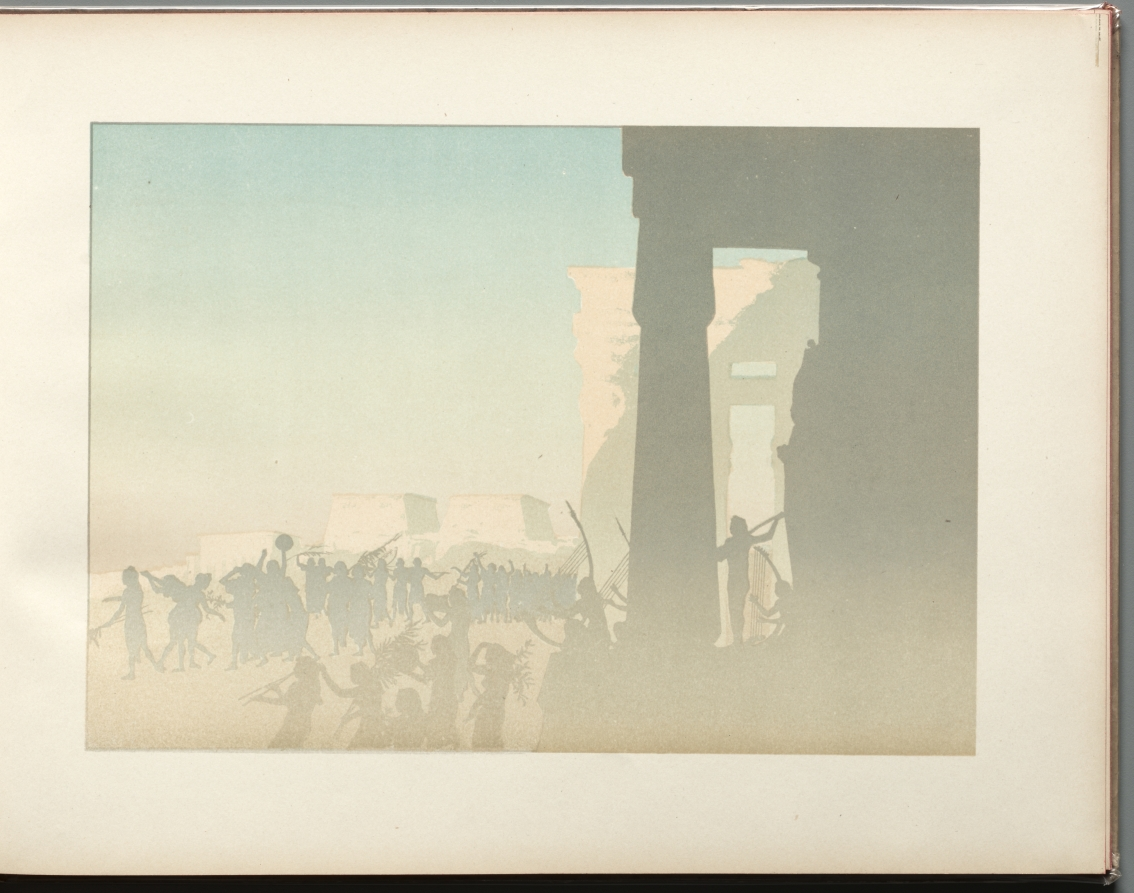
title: The Prodigal Son: Deuxième Tableau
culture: France, 19th century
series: Bound Volume illustrating the poetry and music of Georges Fragerolle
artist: Henri Rivière (French, 1864–1951)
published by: E. Flammarion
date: 1895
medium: 15 color lithographs in a bound volume illustrating the poetry and music of Georges Fragerolle: color lithograph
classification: Bound Volume